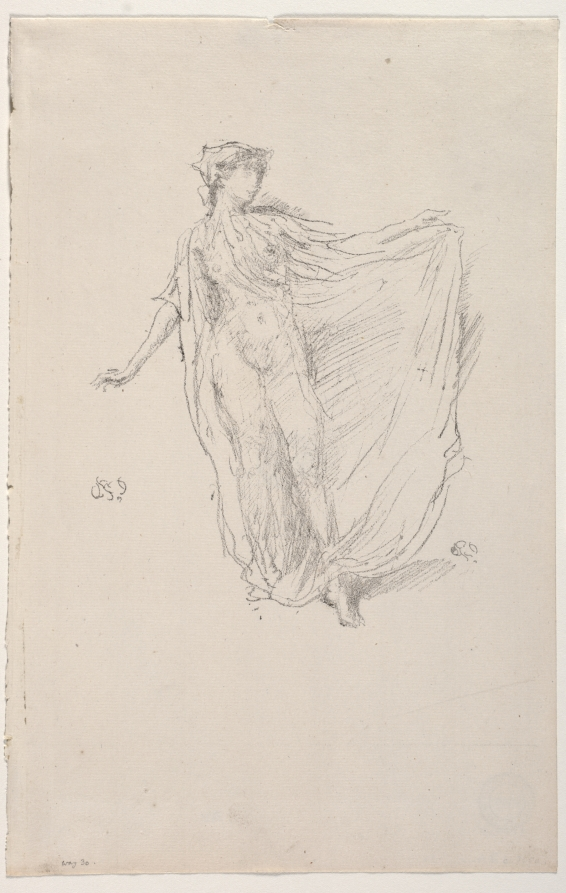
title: The Dancing Girl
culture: America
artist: James McNeill Whistler (American, 1834–1903)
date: 1890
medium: lithograph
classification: Print